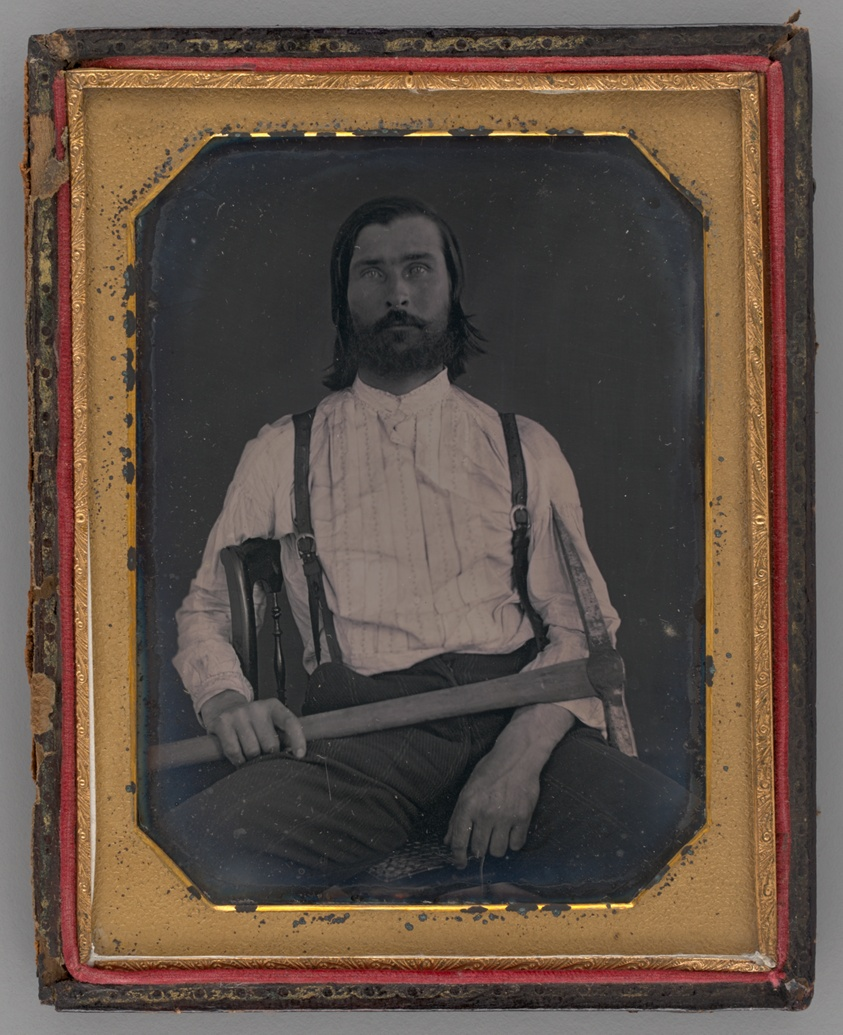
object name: Photograph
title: Untitled (Portrait of a Man Holding a Pick-Axe)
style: 19th century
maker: Unknown maker; American, 19th century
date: 1851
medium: Daguerreotype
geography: United States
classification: portrait; daguerreotype; portrait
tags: lundberg collection, gold mining, gold rush, mines, portraits, portraits: male subject, photography